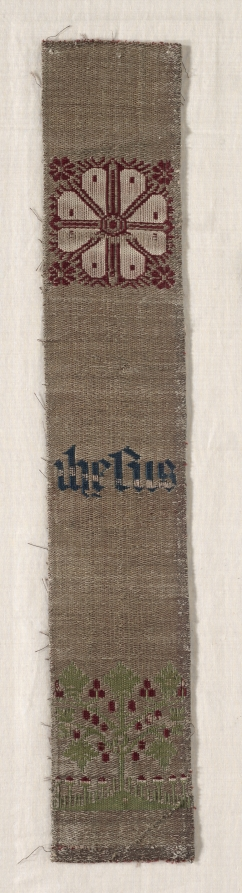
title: Fragment of a Band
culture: Germany, Cologne, 14th-15th century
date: 1300s–1400s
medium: Linen, silk, metal-wrapped thread: compound twill weave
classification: Textile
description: The Cleveland Museum of Art has a number of band fragments that may have been created in a workshop in Cologne, Germany, on the Rhine River. They may have been produced in series and could be adapted for various contexts. Such bands are found, for example, in very similar form on the nearby chasuble, or sleeveless outer vestment. The inscription Jesus and Mary on the bands also point to such a use.